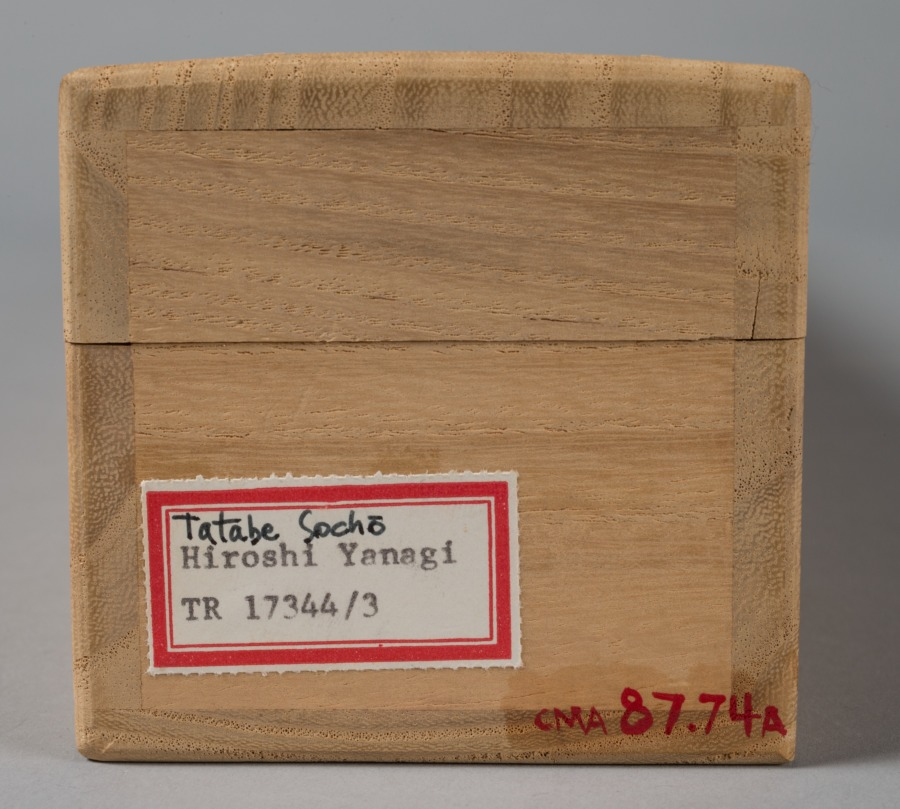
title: Genre Figures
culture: Japan, Edo period (1615–1868)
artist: Takebe Sōchō (Japanese, 1760–1814)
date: c. 1816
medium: hanging scroll; ink and color on paper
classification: Painting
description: Though rarely mentioned in official histories, Socho was an accomplished painter whose talent is readily apparent to the modern eye. For his compositions he chose traditional Japanese stories or everyday events. This painting belongs to a triptych (set of three) that was recently converted from folding screen panels to hanging scrolls.